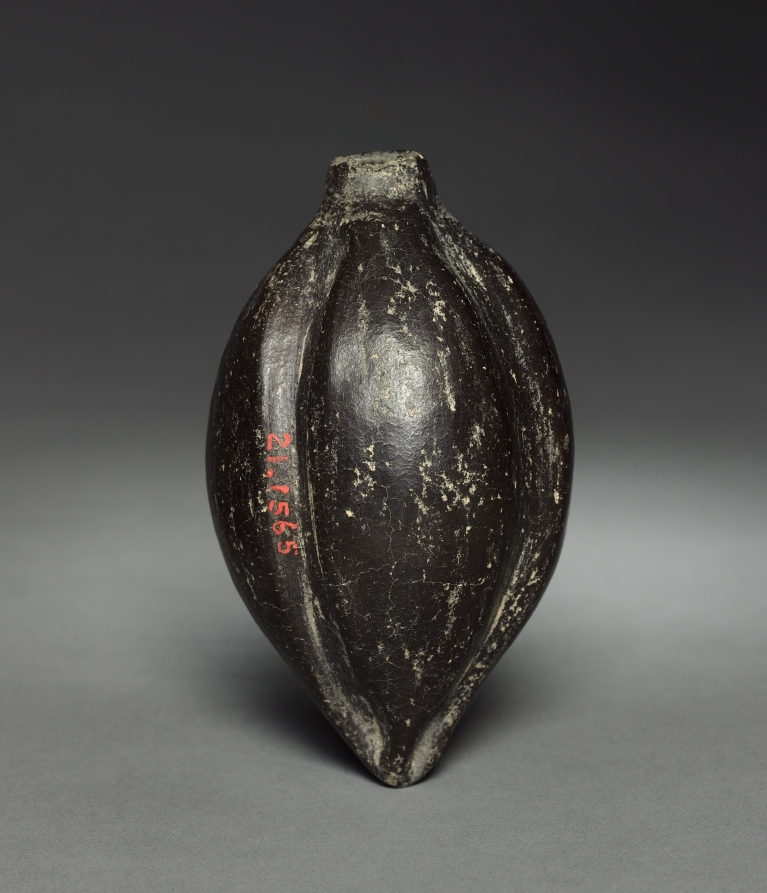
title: Fruit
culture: Colombia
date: before 1921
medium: pottery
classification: Ceramic